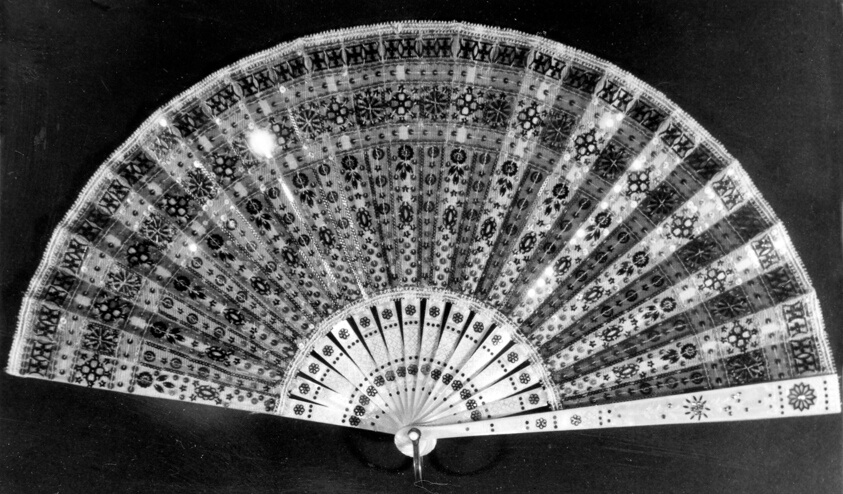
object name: Costume and Accessories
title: Fan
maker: France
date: c. 1855/62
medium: Silk and gauze mount decorated with spangles; pearl sticks and guards with cut steel decoration; gilt loop and rivet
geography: France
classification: textile; fan - needlework; costume accessory - folding fan; costume